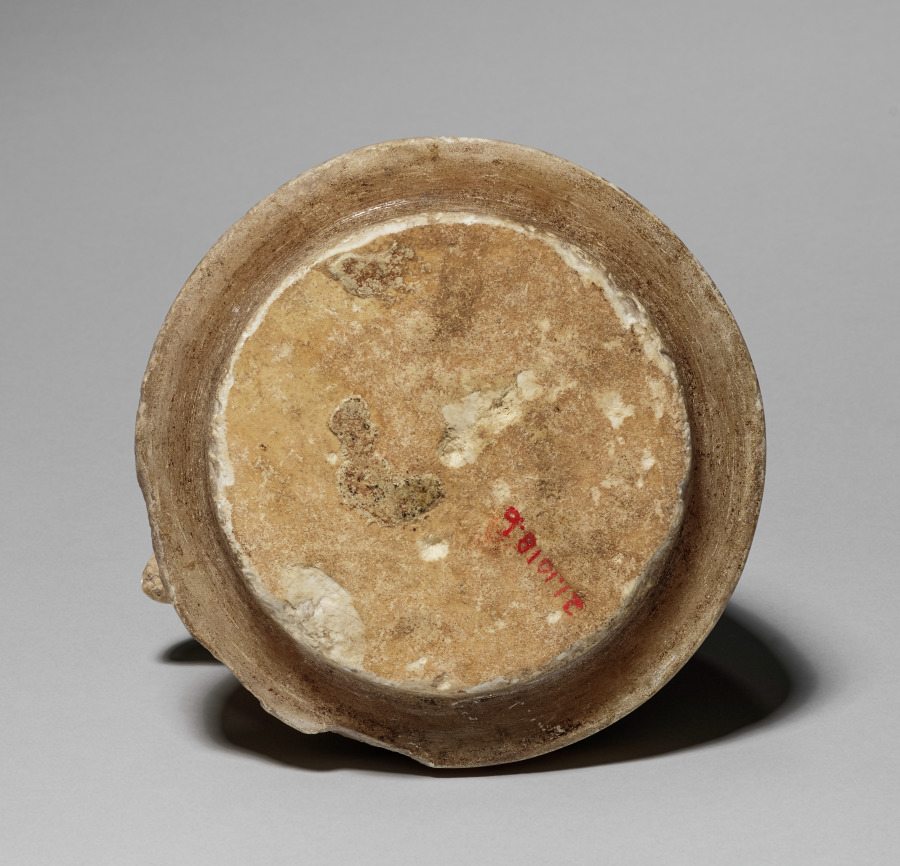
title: Canopic Jar with Falcon's Head (lid)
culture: Egypt, Late period (715–332 BCE), Dynasty 26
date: 664–525 BCE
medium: travertine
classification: Funerary Equipment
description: In the process of mummification, the liver, lungs, stomach, and intestines were removed, separately embalmed, and stored in specialized jars known as canopic jars (after a sailor in Greek mythology, who died at the town of Canopus in the Nile Delta and was worshipped there in the form of a human-headed jar). Each organ was identified with one of four funerary deities collectively known as the Sons of Horus: the liver with Imsety (man's head), the lungs with Hapy (baboon's head), the stomach with Duamutef (jackal's head), and the intestines with Qebehsenuef (falcon's head). It was their duty to protect the deceased and restore to him his body parts in the hereafter.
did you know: The falcon-headed deity Qebehsenuef protected the contents of this canopic jar. It contained the remains of the deceased's intestines, which were kept safe for the afterlife.